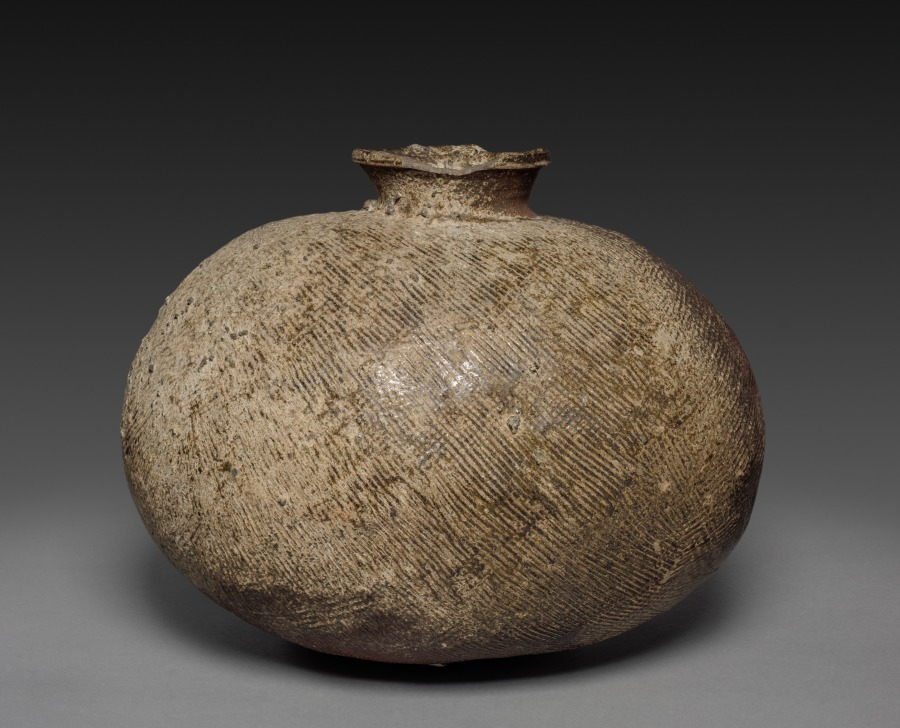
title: Jug with Oblong Body: Sueki Ware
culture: Japan, Nara period (710–94)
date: 700s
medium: stoneware, with impressed decoration and natural ash glaze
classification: Ceramic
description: The unusual shape of this sturdy vessel derives from two deep bowl forms being joined together at their mouths. An opening was then cut out where the separately formed neck and mouth were attached. This vessel shape came to early Japan from Korea, as did the paddled surface decoration technique.The jug's rich surface tonalities were created by wood ash in the kiln chamber that settled on the vessel during firing. The mottled gray areas indicate where large accumulations of ash adhered to the hot body. The darker, green skin that appears shiny or reflective represents generous ash accumulations that vitrified, becoming a natural green glaze. In one area this accumulation is so rich that it formed rivulets of glassy green glaze, propelled across the black matte surface by the fiery winds coursing within the kiln.